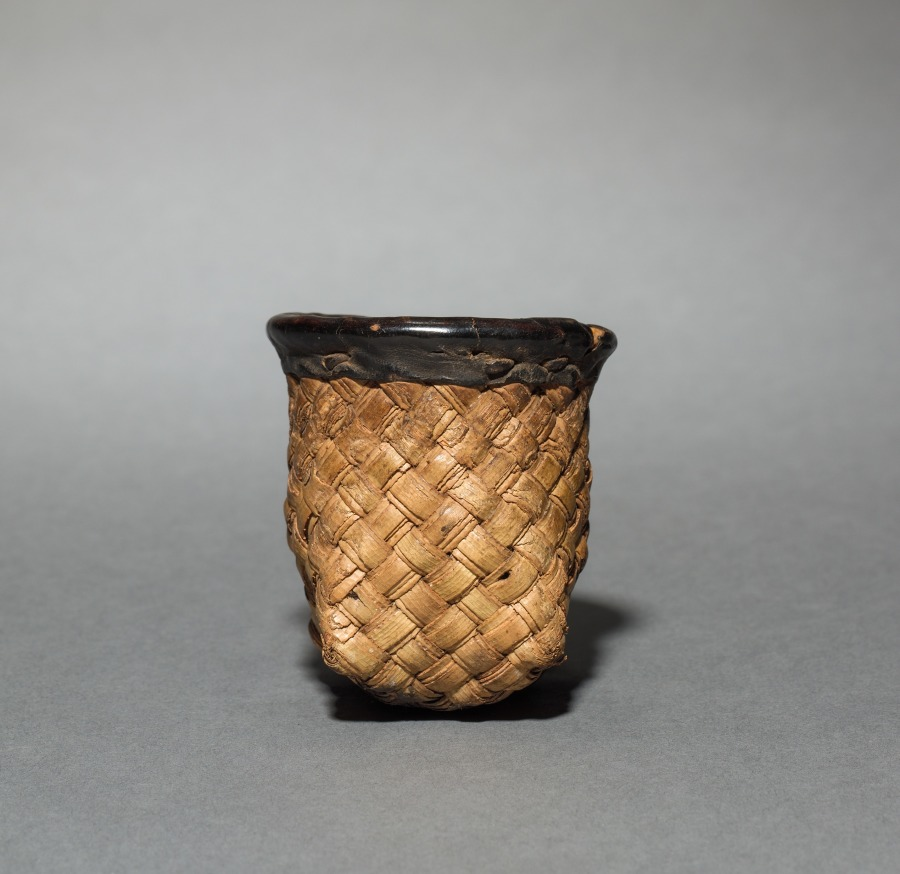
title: One of Ten Nesting Wedding Baskets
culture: Africa, Western Africa, Burkina Faso, Lobi–style maker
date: c 1900s?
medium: Plant fiber and leather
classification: Vessels